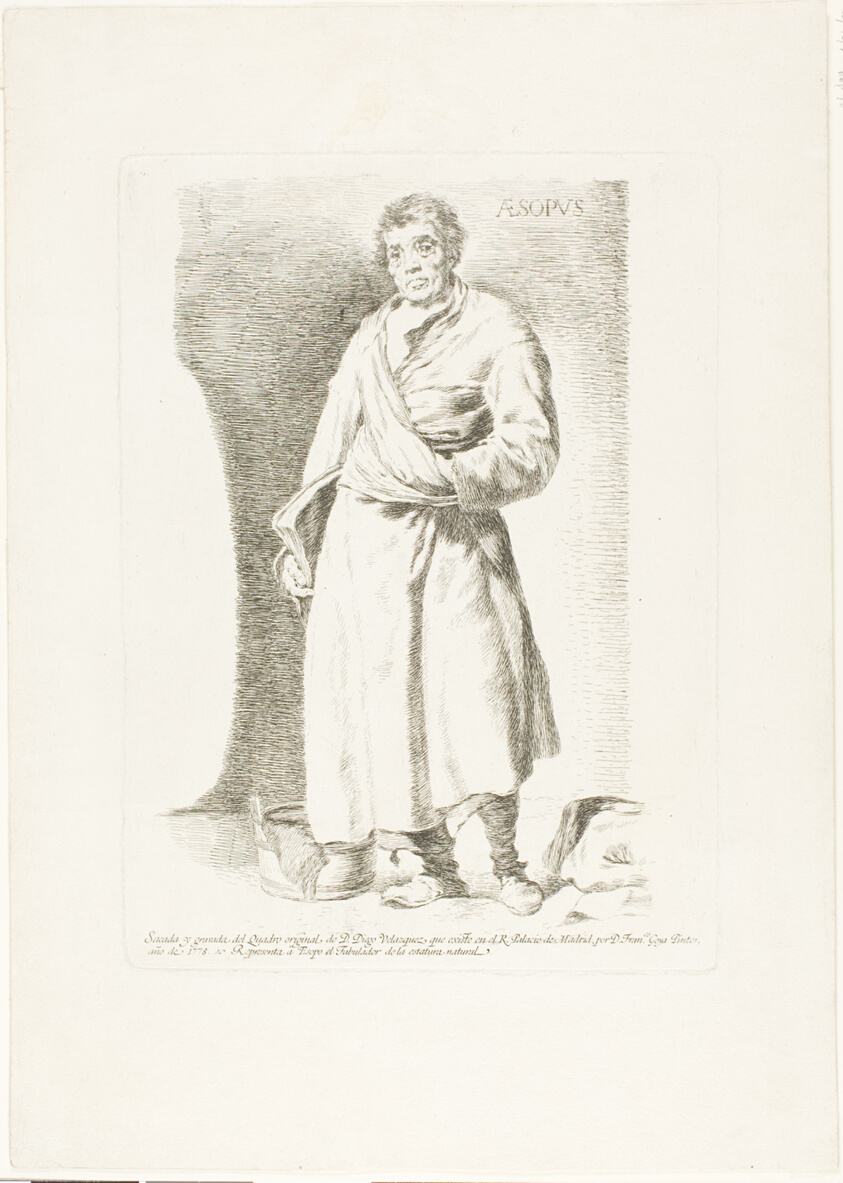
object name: Print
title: Aesop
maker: Francisco José de Goya y Lucientes (Spanish, 1746-1828); after Diego Velázquez (Spanish, 1599-1660)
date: 1778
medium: Etching with engraved inscription on laid paper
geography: Spain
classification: etching; print; prints and drawing